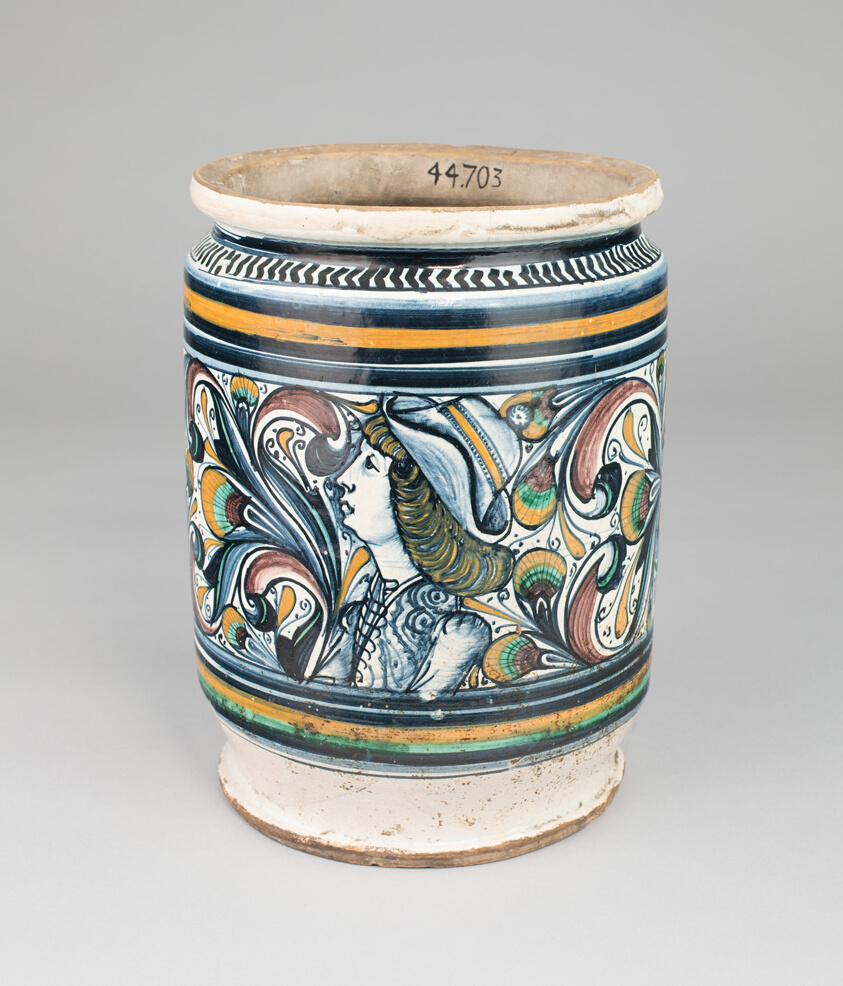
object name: Ceramics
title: Drug Jar (Albarello)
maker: Italian, probably Faenza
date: c. 1470-c. 1490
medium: Tin-glazed earthenware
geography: Faenza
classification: earthenware; european decorative arts; ceramics; decorative arts